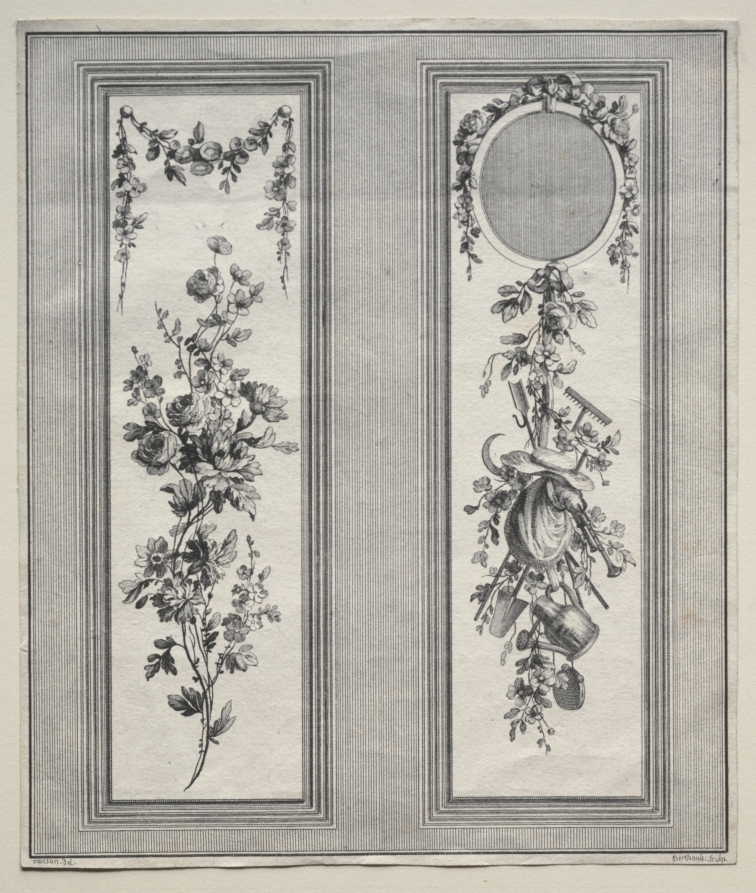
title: Garden Ornament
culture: France, 18th century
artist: Pierre Gabriel Berthault (French, 1748–1819)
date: c. late 1700s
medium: engraving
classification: Print